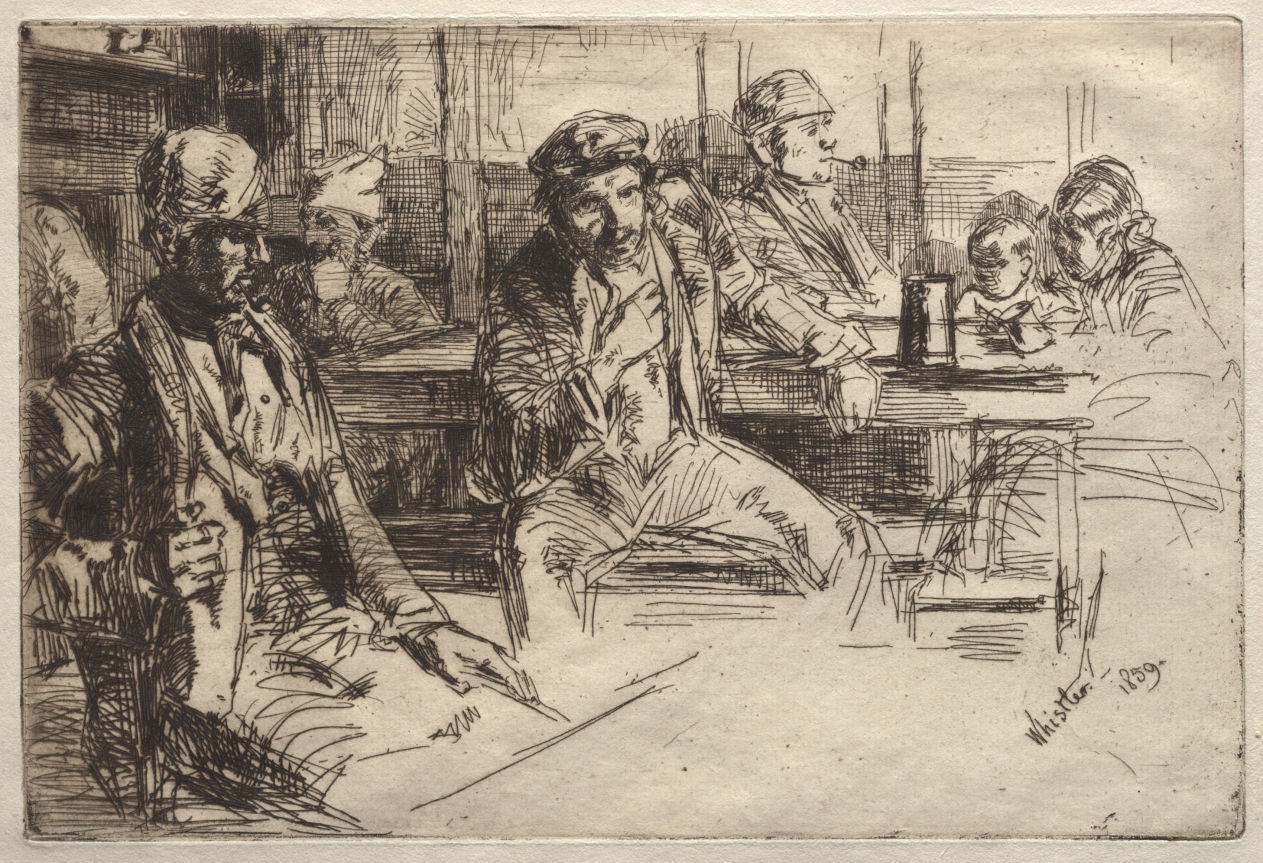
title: Longshoremen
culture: America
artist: James McNeill Whistler (American, 1834–1903)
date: 1859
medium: etching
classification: Print